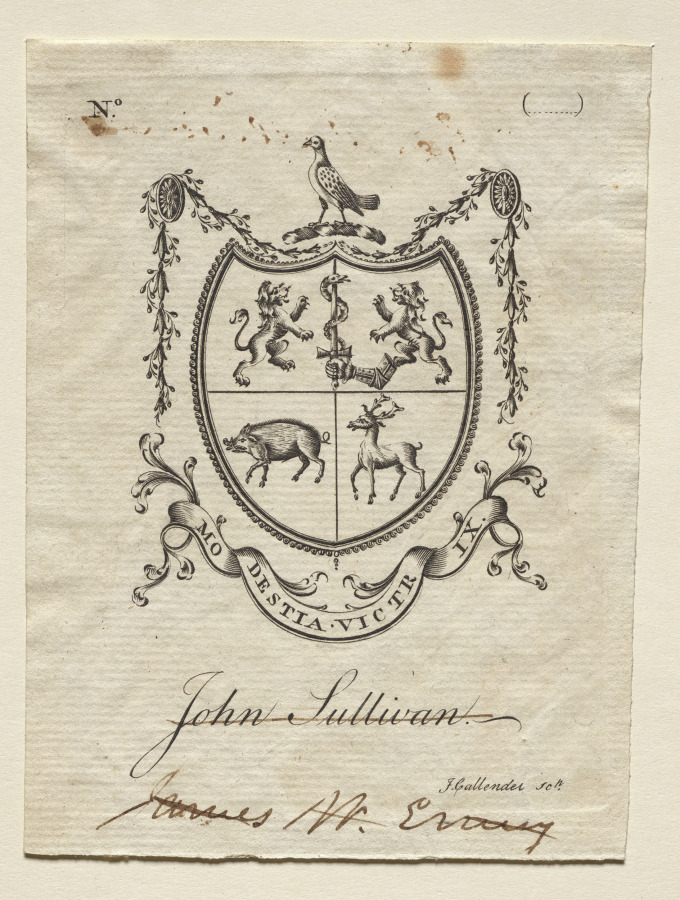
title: Bookplate: Coat of Arms with John Sullivan inscribed below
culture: America, late 18th-early 19th century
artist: Joseph Callender (American, 1751–1821)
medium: engraving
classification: Print